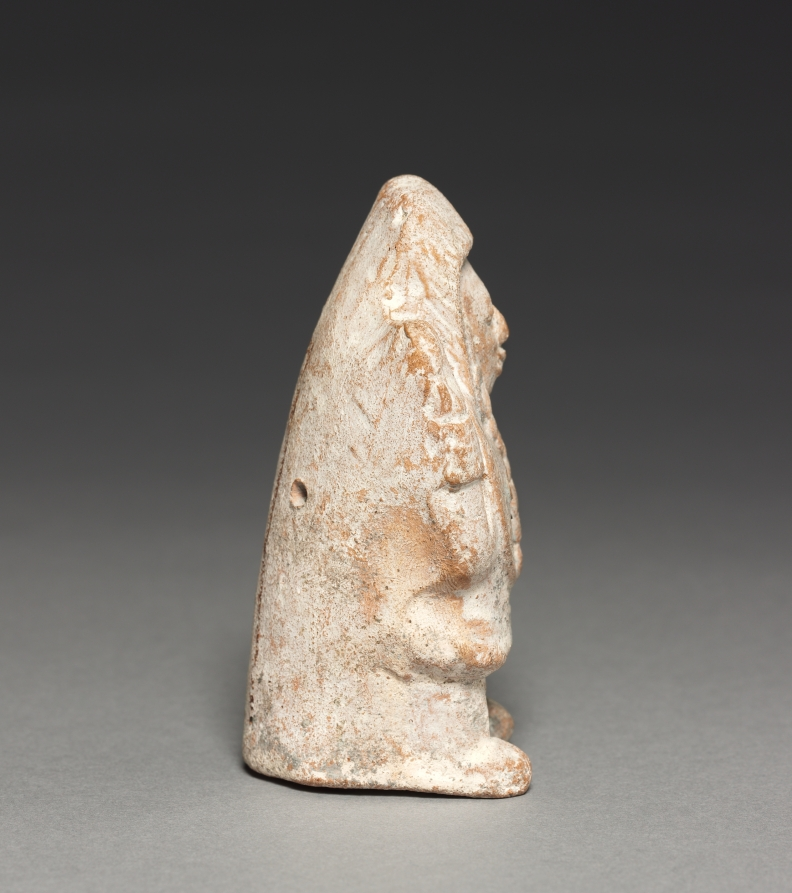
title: Female Figurine Rattle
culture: Mexico, Campeche, Jaina Island, Maya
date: 600–900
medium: Ceramic, pigment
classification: Sculpture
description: This hollow, mold-made figurine contains pellets that transform it into a rattle used as a musical instrument, perhaps during household rituals.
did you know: This hollow, mold-made figurine contains pellets that transform it into a rattle.